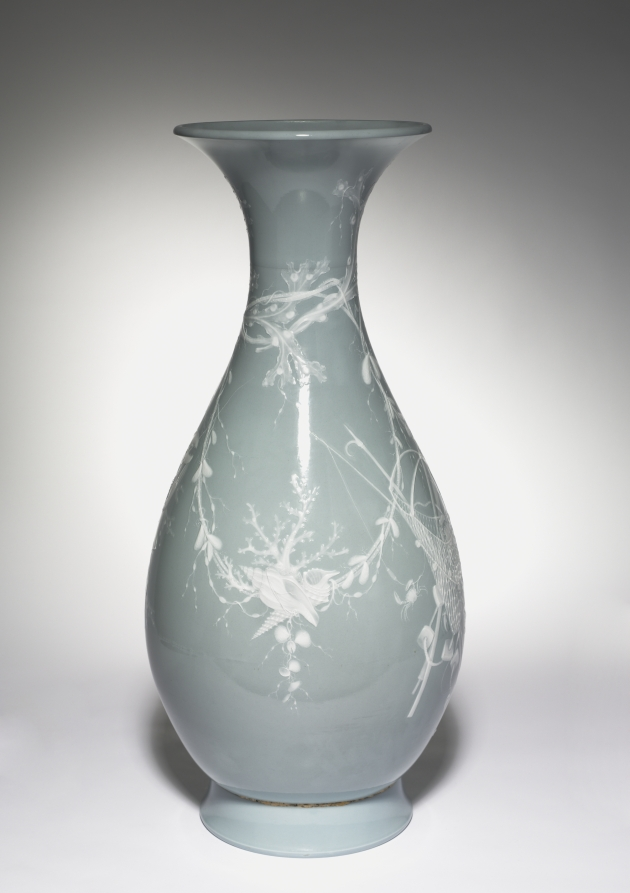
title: Vase Bertin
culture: France, 19th century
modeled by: Jules-Constant Peyre (French, 1811–1870?)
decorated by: Léopold Jules Gély (French)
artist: Sèvres Porcelain Factory (French, est. 1756)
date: c. 1855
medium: porcelain with pâte-sur-pâte decoration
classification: Ceramic